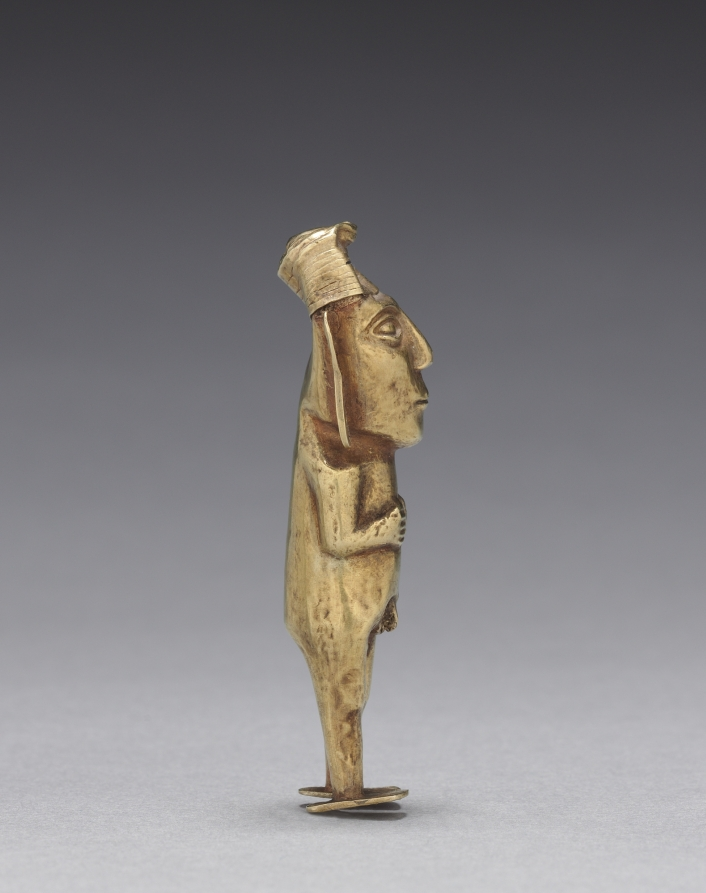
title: Male Figurine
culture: Peru, Lambayeque Valley, Inka style (1400-1532)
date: 1400–1532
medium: hammered gold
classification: Metalwork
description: Precious metal was a major Inka artistic medium, but most was melted down after the conquest to fund the Spanish court. The sole remains are small-scale objects from tombs and offerings. Figurines like this have been found at shrines on sacred mountain peaks, where they accompanied child sacrifices in offerings made during times of crisis, such as famine.